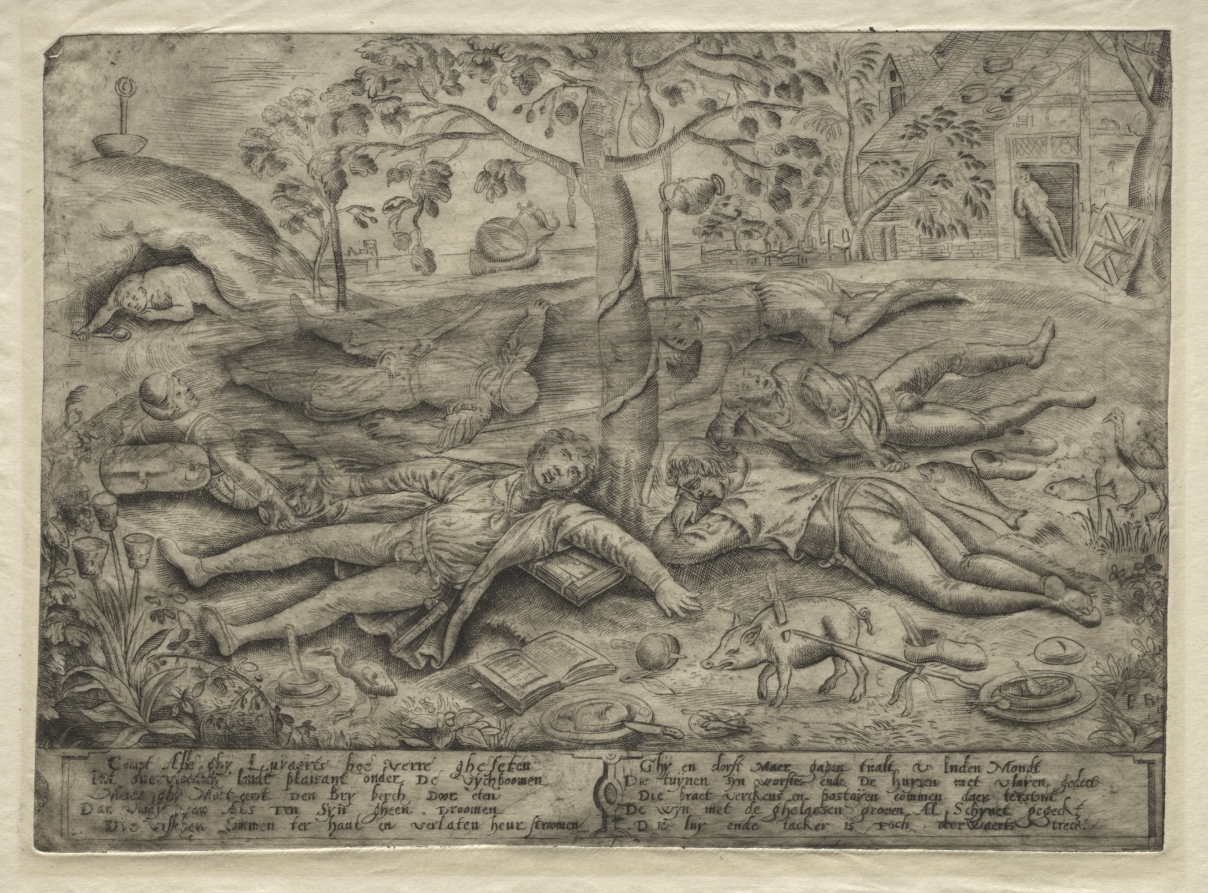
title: Gluttony (Land of Cockaigne)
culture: Flanders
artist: Peeter Baltens (Flemish, 1526/28–before 1584)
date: 1560s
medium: engraved copper plate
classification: Plate